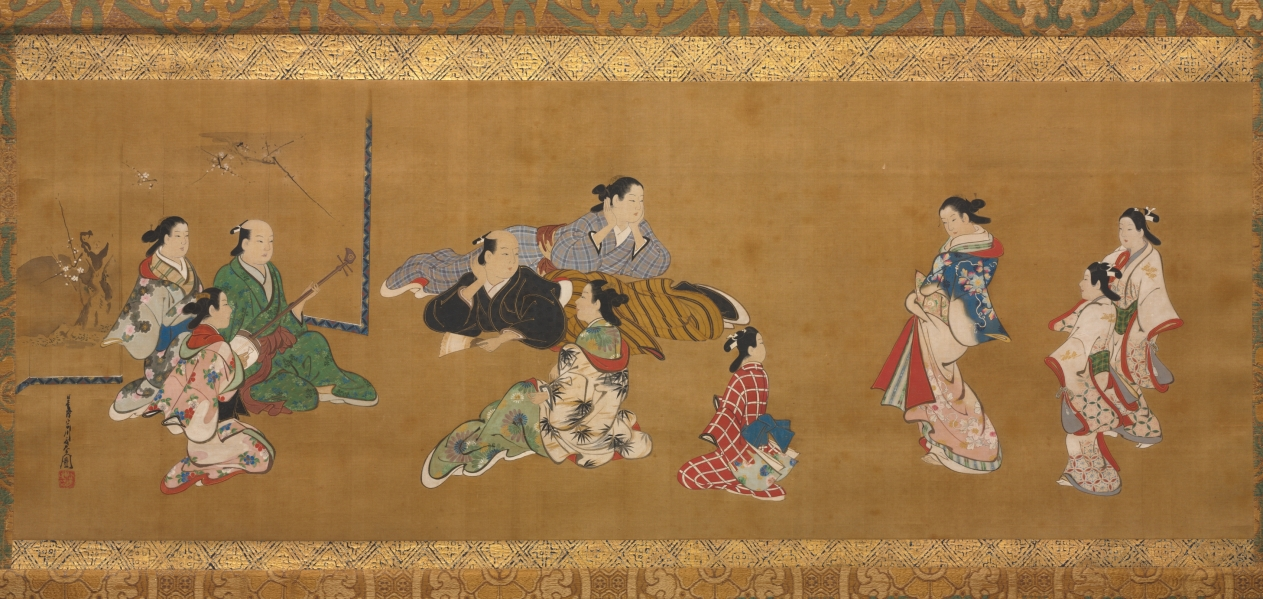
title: Entertainment Scene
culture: Japan, Edo period (1615–1868)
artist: Miyagawa Chōshun (Japanese, 1683–1753)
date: c. 1710–53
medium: hanging scroll; ink and color on silk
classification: Painting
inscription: artist's signature and seal lower left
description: This painting captures the moment when a high-ranking courtesan accompanied by two trainees makes her grand entrance into a salon. The guest of honor, a samurai who reclines beneath a striped robe while dangling his fan, turns from the musical entertainment to gaze at the spectacle of her arrival. The fortunes of everyone in the room depend on how she orchestrates the rest of the evening, as the more the samurai spends on her services, the more trickles down to the other entertainers who are present.